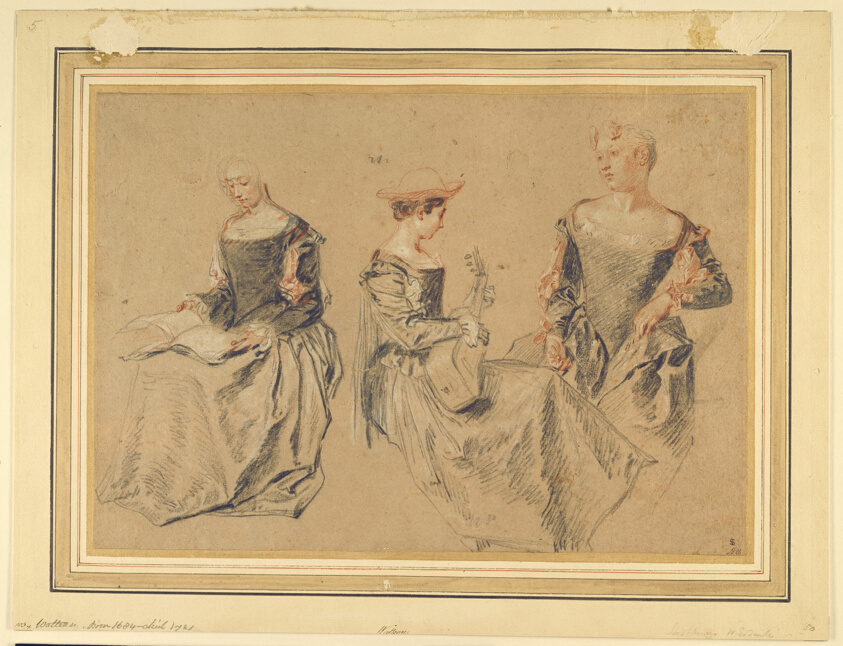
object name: Drawing and Watercolor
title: Three Studies of Seated Women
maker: Jean Antoine Watteau (French, 1684-1721)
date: c. 1715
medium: Black, red, and white chalk on gray-brown laid paper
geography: France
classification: chalk; drawings (visual works); prints and drawing